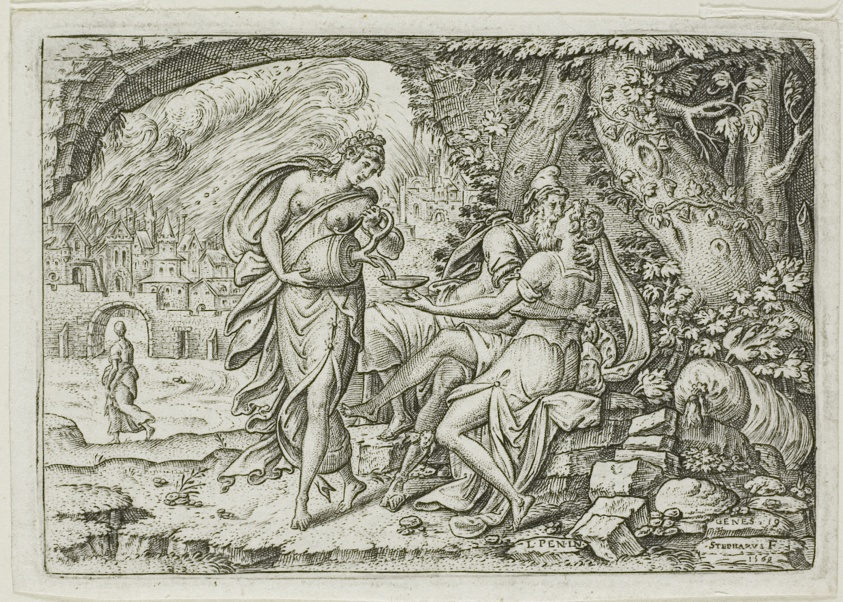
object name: Print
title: Lot and His Daughters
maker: Etienne Delaune; French, c. 1519-1583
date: 1569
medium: Engraving on paper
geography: France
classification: engraving; print; prints and drawing